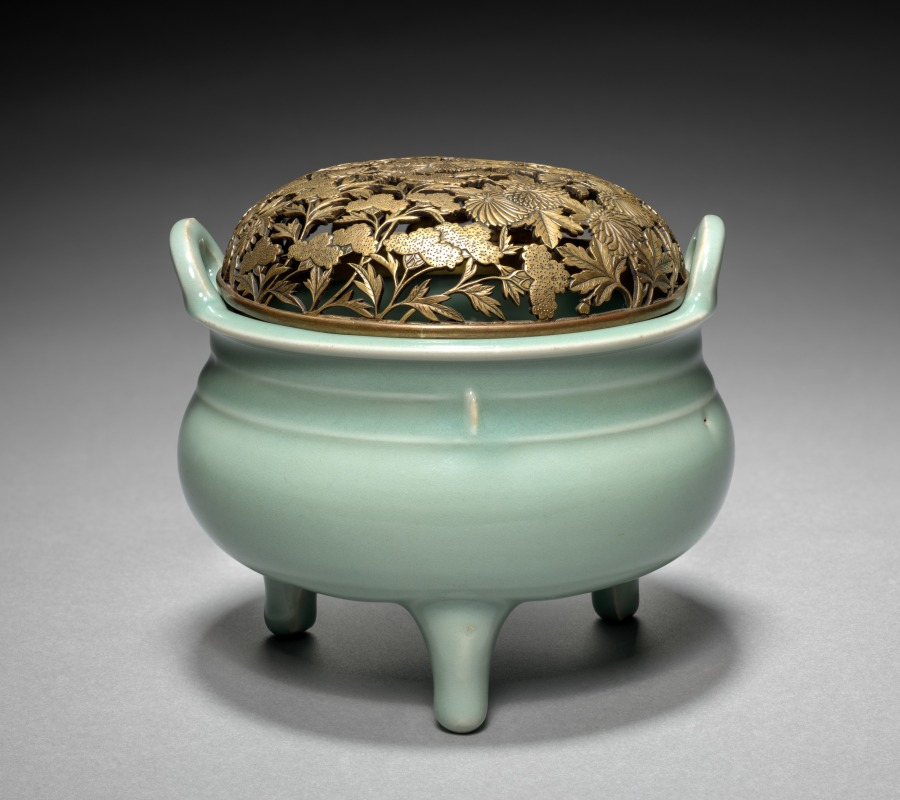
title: Covered Incense Burner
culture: Japan, Meiji period (1868–1912)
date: late 1800s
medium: Porcelain with gilt bronze cover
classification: Ceramic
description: This incense burner emulates Chinese porcelain in its glaze and form. A number of prominent Meiji-period ceramicists explored classical Chinese forms and glazes even as they also produced stoneware with Japanese-style glazes.